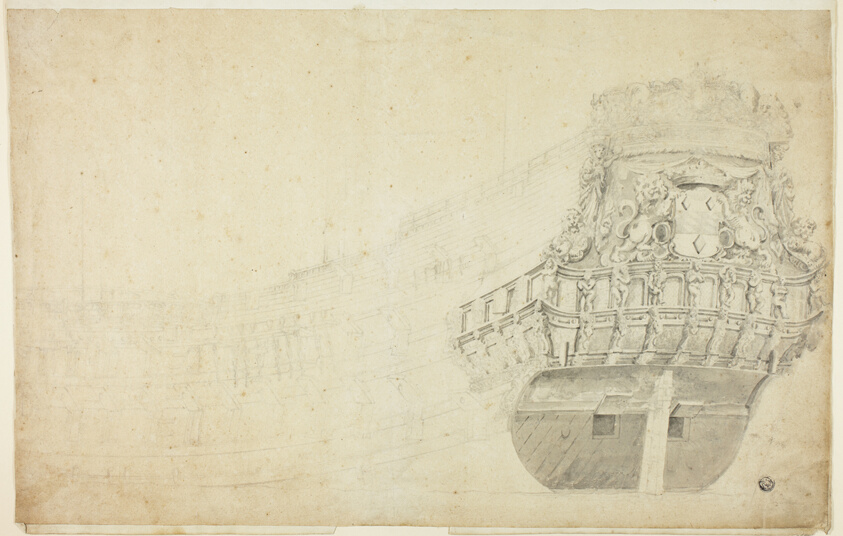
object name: Drawing and Watercolor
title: Partial Sketch of a Dutch Vessel Seen from Port Quarter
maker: Attributed to Willem van de Velde, I (Dutch, c. 1611-1693); or possibly Willem van de Velde, II (Dutch, 1633-1707)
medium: Graphite with brush and gray wash on buff laid paper, tipped onto ivory laid paper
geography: Holland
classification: graphite; drawings (visual works); prints and drawing